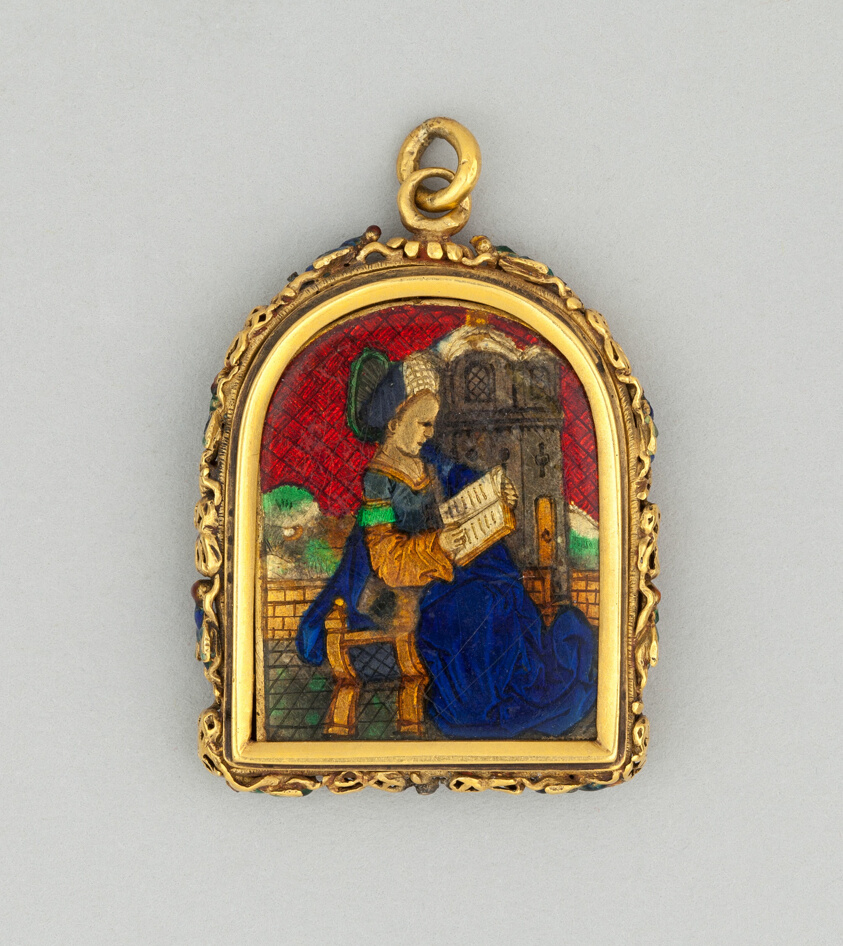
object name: Costume and Accessories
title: Reliquary Pendant of Saint Barbara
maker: French or Netherlandish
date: c. 1500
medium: Gold and enamel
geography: France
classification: gold; jewelry; metalwork; european decorative arts; costume